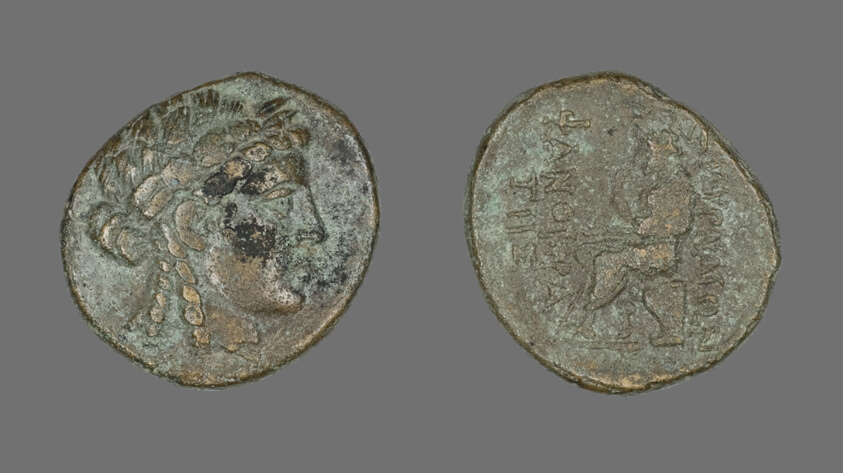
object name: Coin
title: Coin Depicting the God Apollo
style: greek, ancient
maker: Greek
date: 2nd-1st century BCE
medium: Bronze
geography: Ancient Greece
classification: coin; ancient art